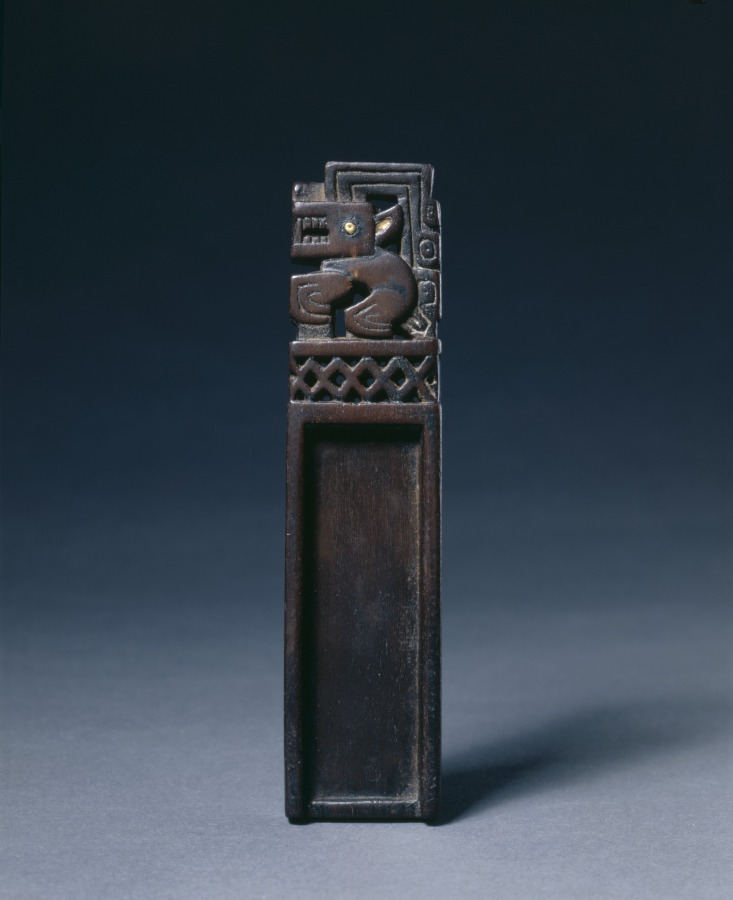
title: Snuff Tablet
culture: Peru, North Highlands, Recuay style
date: 1–650 CE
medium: wood with gold foil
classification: Furniture and woodwork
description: Both of these objects feature a creature known as the "Recuay feline," although it could also refer to a fox, dog, or viscacha (a rodent). Whatever its identity, the prominent crest on its head ties it to the supernatural realm, a connection underlined by the deity head that also appears on the dipper and by the ritual function of snuff tablets, which were used to inhale hallucinogenic snuffs during religious ceremonies.